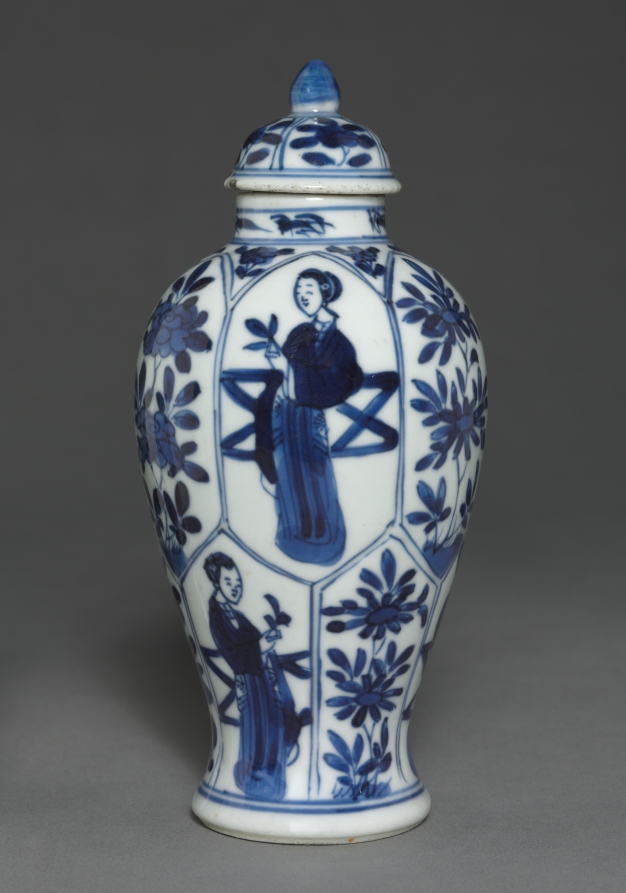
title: Jar with Cover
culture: China, Qing dynasty (1644-1911)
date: 19th Century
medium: porcelain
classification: Ceramic